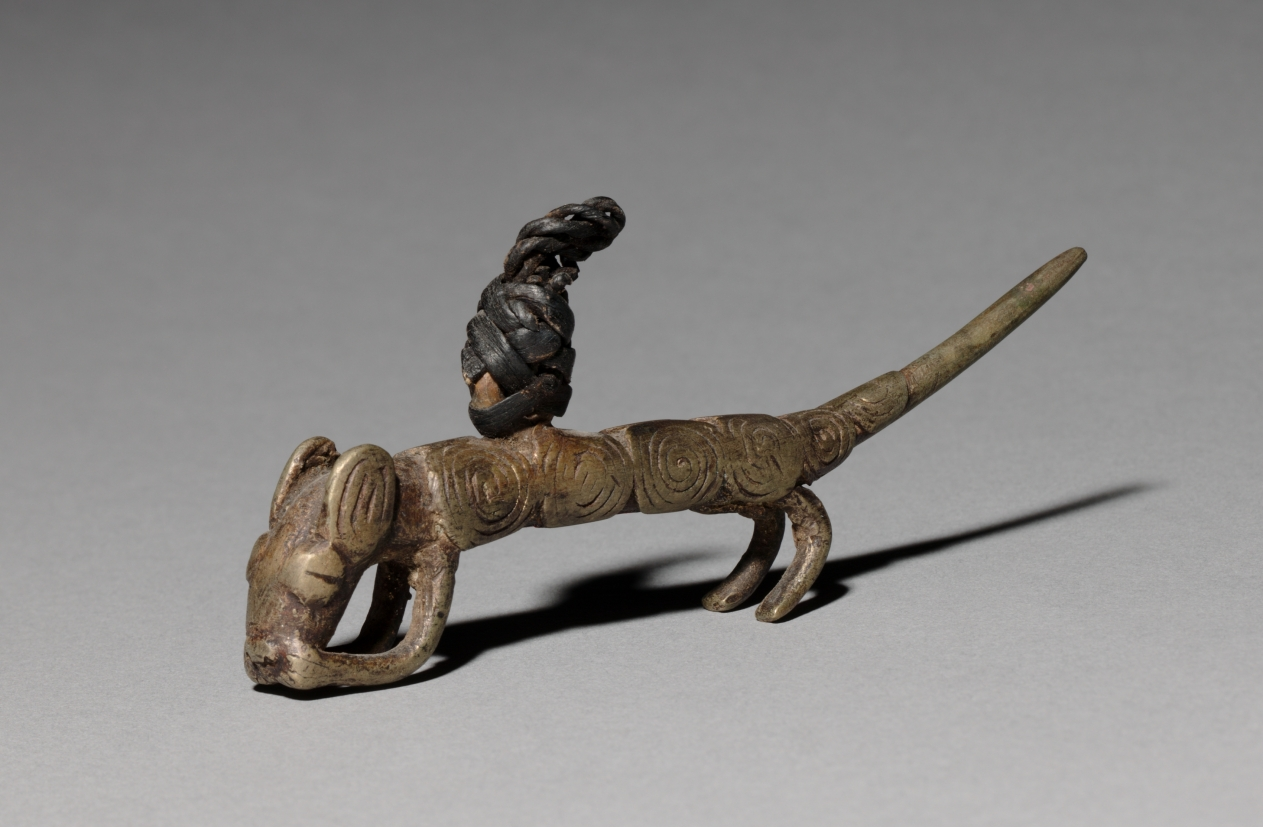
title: Animal Pendant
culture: Africa, West Africa, Burkina Faso, Tusyan-style maker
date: 1900s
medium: Copper alloy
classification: Jewelry